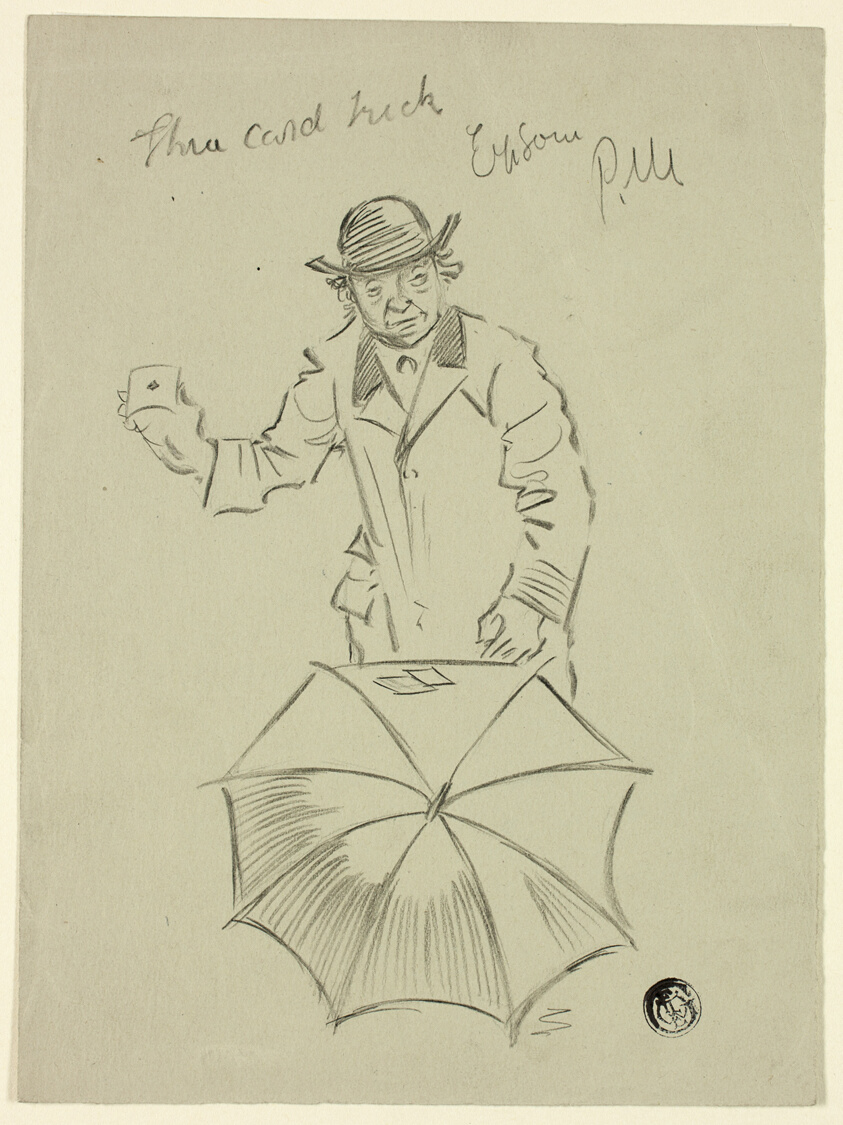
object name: Drawing and Watercolor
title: Three Card Trick, Epsom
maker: Philipp William May; English, 1864-1903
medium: Black crayon and graphite on gray wove paper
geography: England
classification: crayon; drawings (visual works); prints and drawing